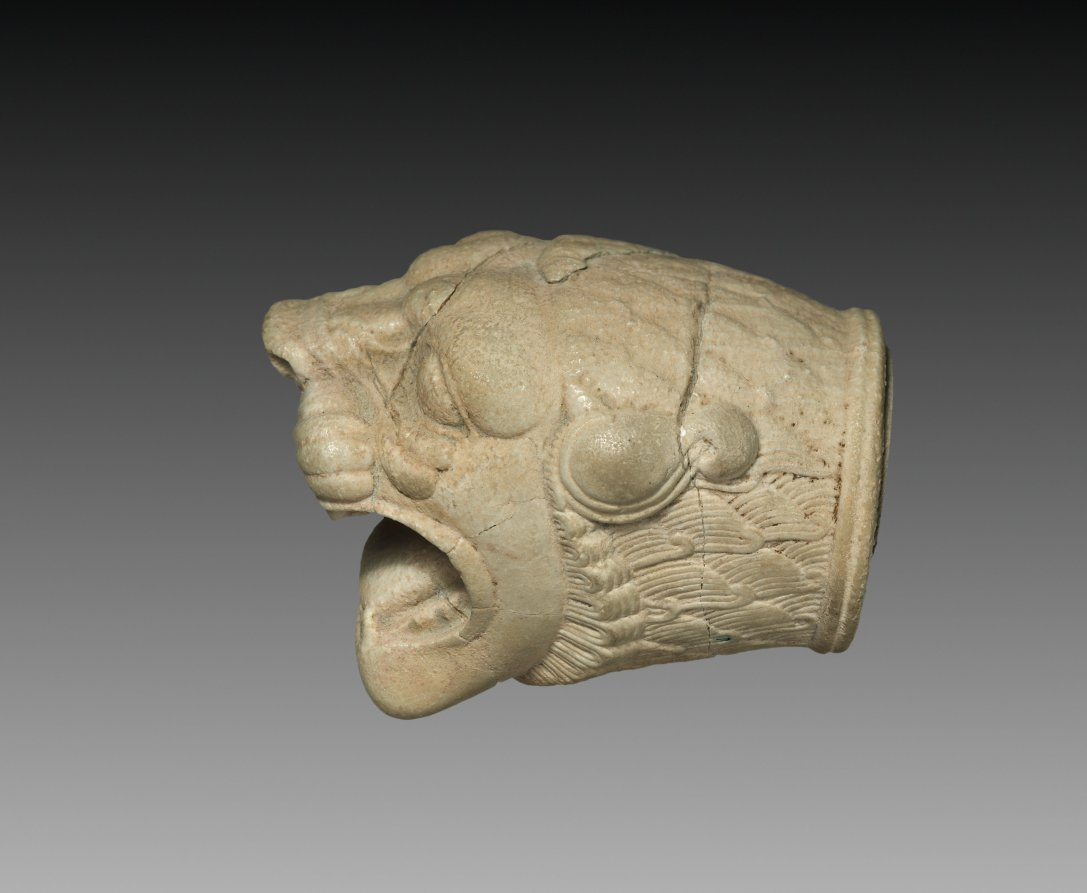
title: Lion's Head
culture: Iran, Achaemenid (550–330 BCE)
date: 500s BCE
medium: marble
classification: Sculpture